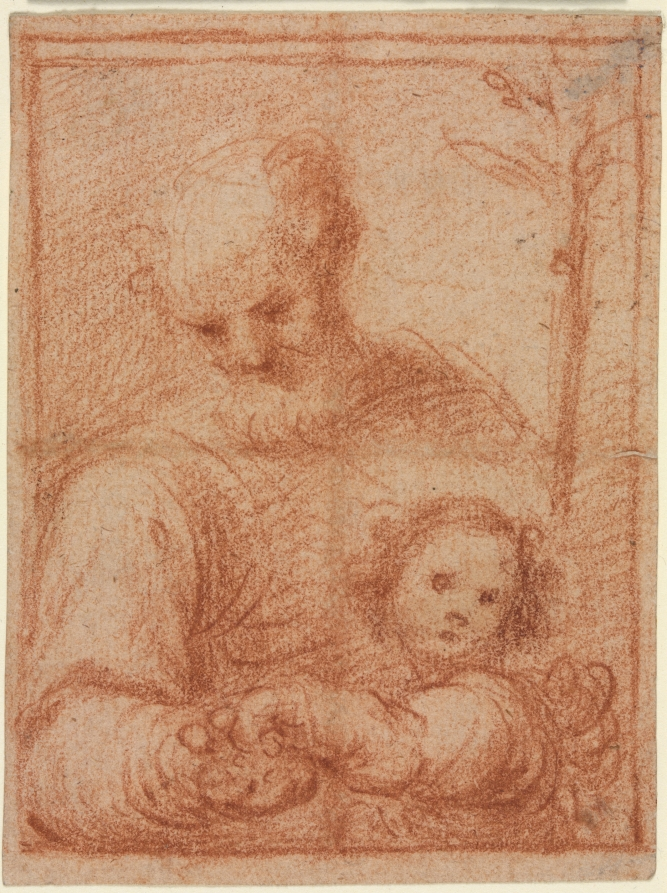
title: Joseph and Child (recto)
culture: Italy, 16th century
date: 16th century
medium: red chalk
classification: Drawing